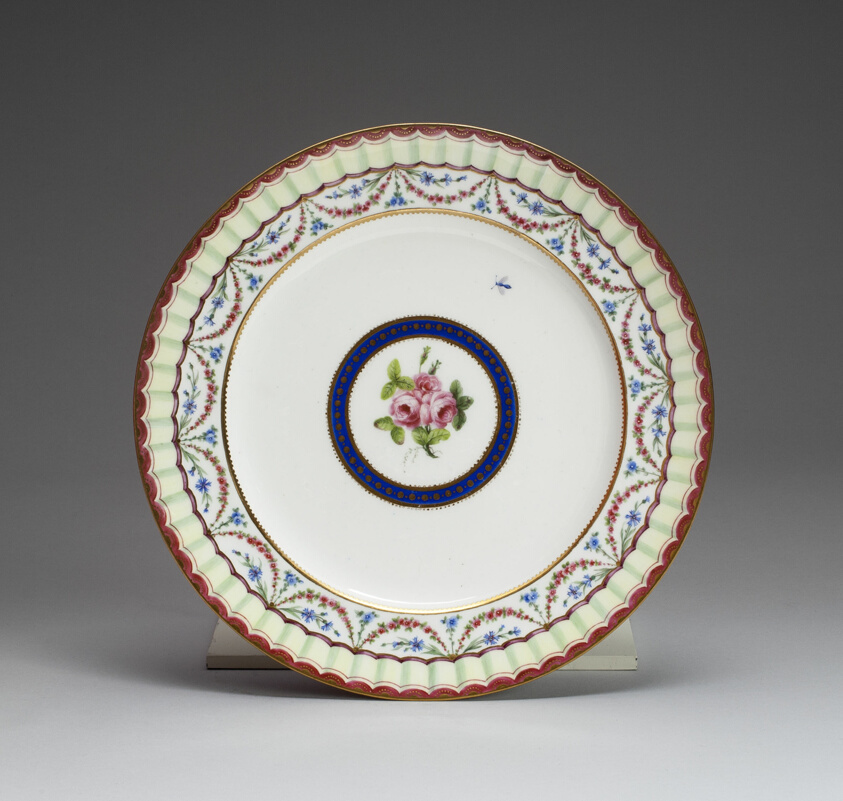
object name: Ceramics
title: Plate made for William Beckford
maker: Sèvres Porcelain Manufactory; French, founded 1740; Painted by Jean-Baptiste Tandart (French, active 1754–1803) and Etienne-Henry Le Guay (French, active 1748–49, 1751–96)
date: 1792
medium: Soft-paste porcelain, polychrome enamels, and gilding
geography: Sèvres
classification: plate (general, dish); tableware; dish (vessel); ceramics; porcelain; european decorative arts